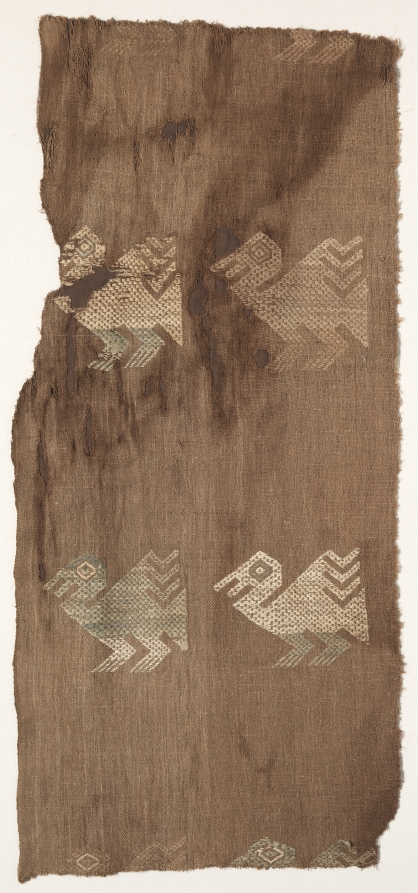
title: Fragment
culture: Peru, North Coast, Chimú Culture, 12th-15th century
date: c. 1100–1400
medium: plain cloth, brocaded; cotton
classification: Textile